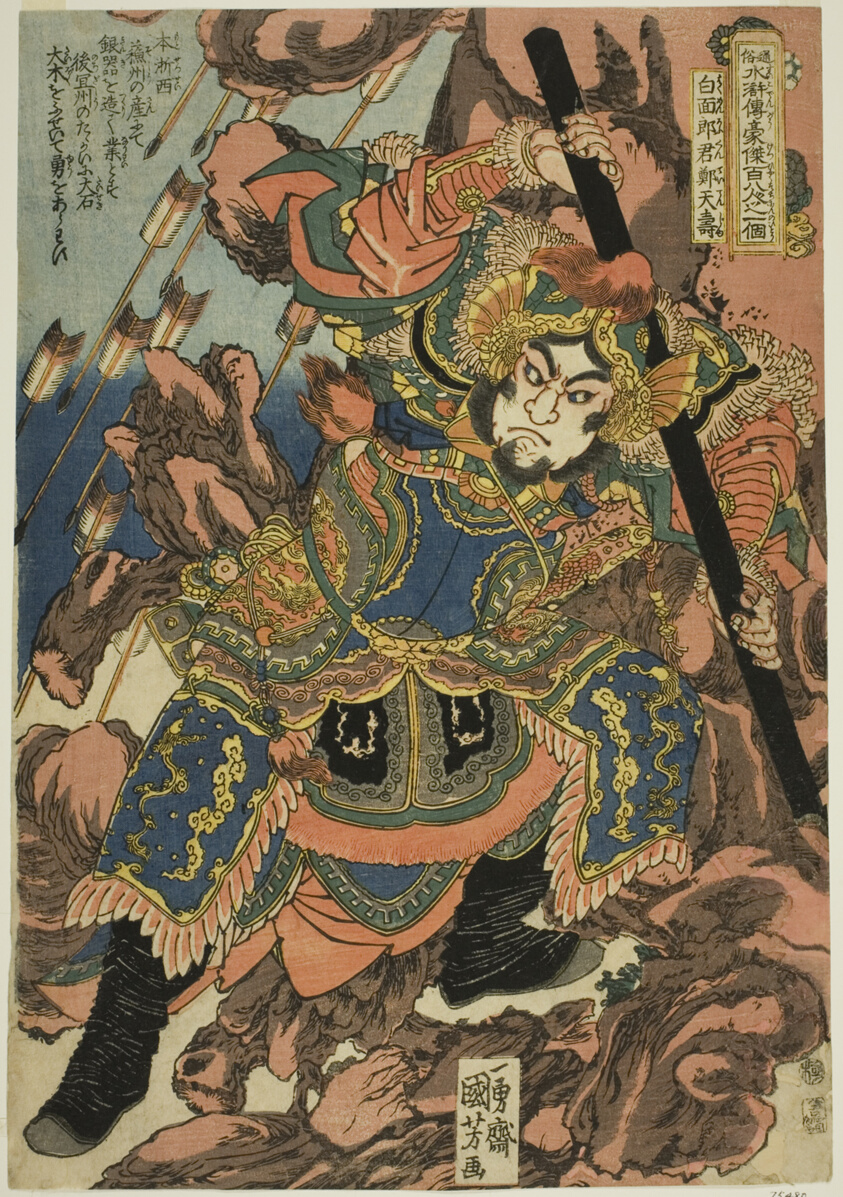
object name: Print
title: Zheng Tianshou (Hakumenrokun Teitenja), from the series "One Hundred and Eight Heroes of the Popular Water Margin (Tsuzoku Suikoden goketsu hyakuhachinin no hitori)"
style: Japanese (culture or style)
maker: Utagawa Kuniyoshi (Japanese, 1797-1861)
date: c. 1827/30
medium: Color woodblock print; oban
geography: Japan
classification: woodblock print; print; asian art